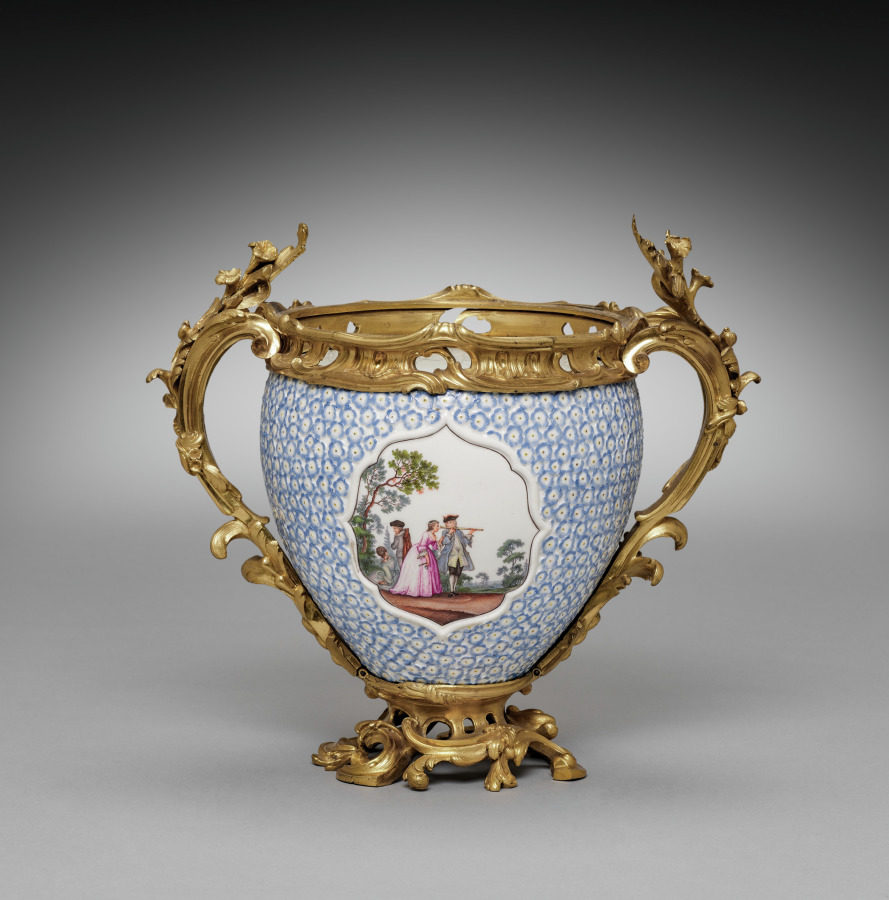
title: Vase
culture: Germany, 18th century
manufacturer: Meissen Porcelain Factory (German, est. c. 1710)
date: 1749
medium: porcelain mounted in gilt bronze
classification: Ceramic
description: One of these vases is dated 1749. They were perhaps part of a set of four covered vases that we know from documents were acquired by Mme. de Pompadour, mistress of Louis XV in 1752.